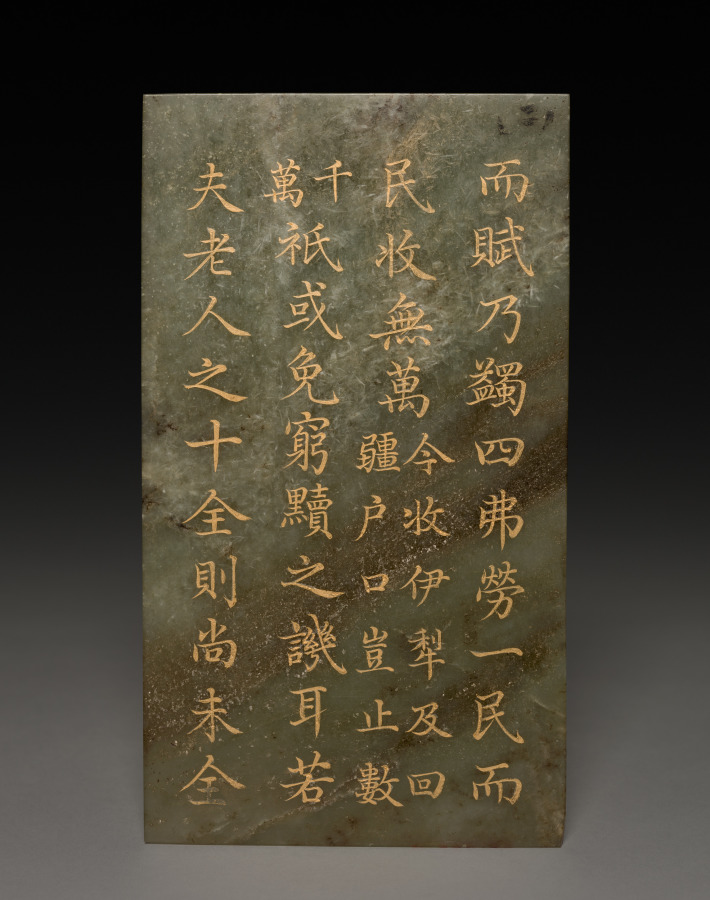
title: Tablet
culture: China, Qing dynasty (1644–1911), Qianlong reign (1736–95)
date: 1778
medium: jade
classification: Jade